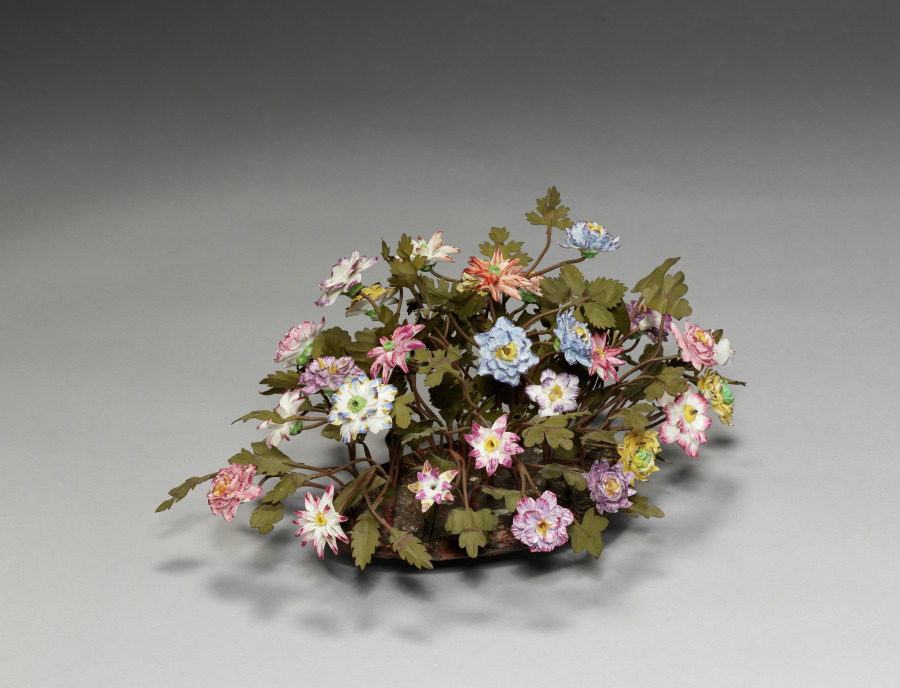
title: Centerpiece, or Jardinière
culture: France, Paris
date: c. 1830–1850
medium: gilt bronze with enamel flowers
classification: Metalwork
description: Regrettably, a maker's mark does not appear on this piece: thus the factory that made it remains unknown. Nevertheless, its design, castings, and gilding are of fine quality and indicate that it is the product of a group of talented craftsmen who worked in the robust taste of the second quarter of the 19th century.